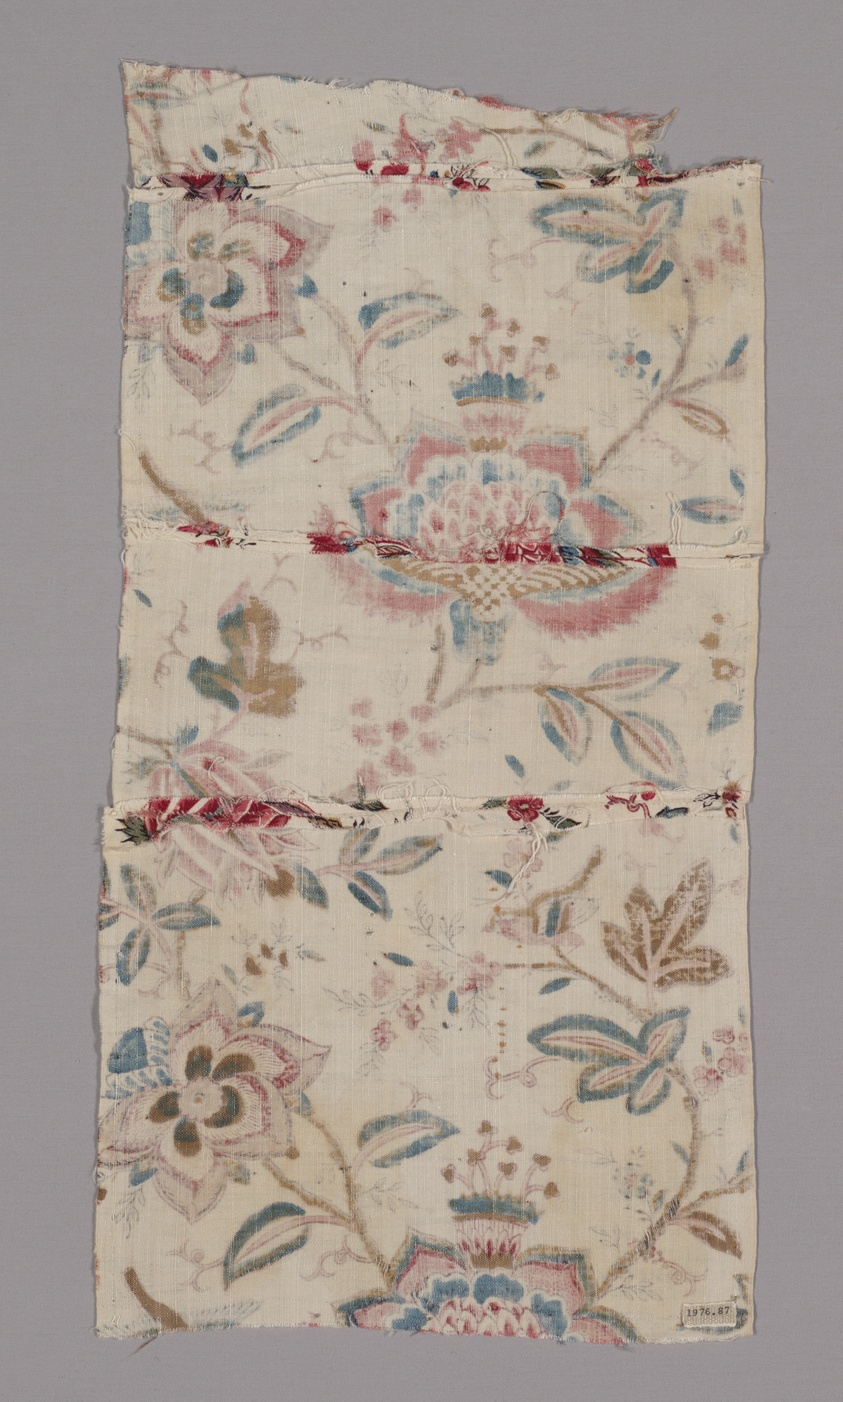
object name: Textile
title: Fragment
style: jouy-en-Josas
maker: France, probably Jouy-en-Josas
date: 18th century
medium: Cotton, plain weave; block printed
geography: France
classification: textile; weaving - printed